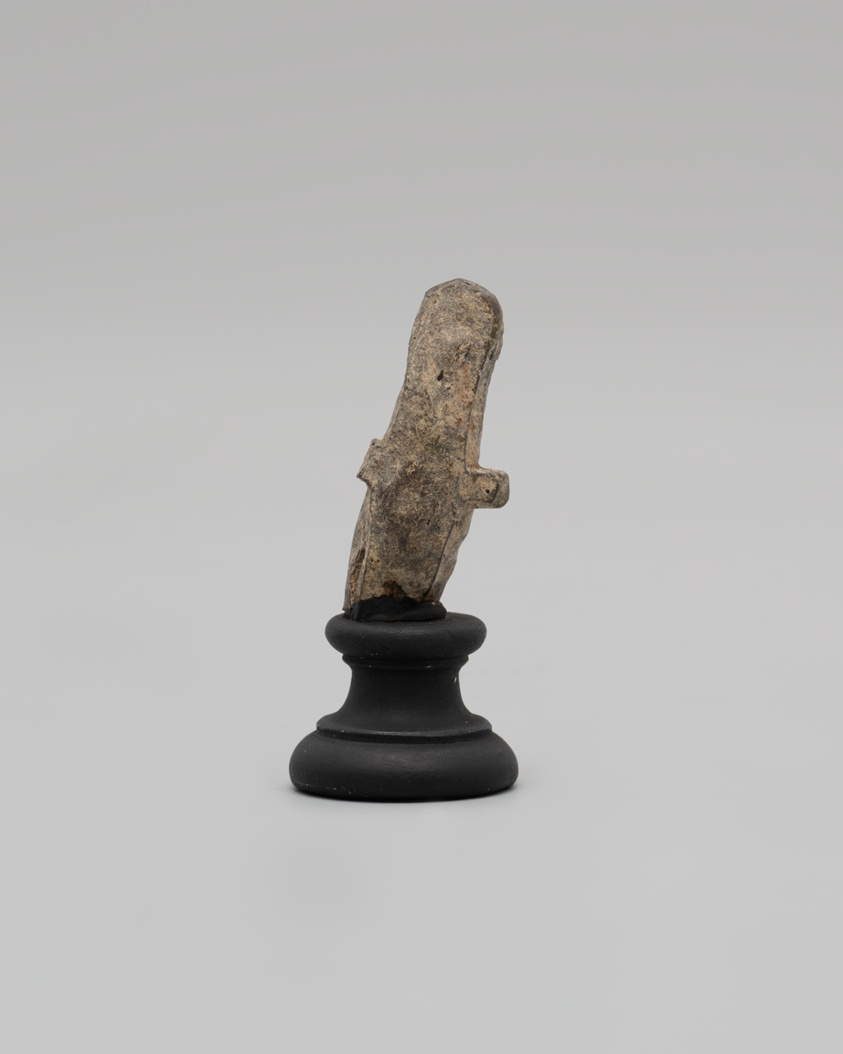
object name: Sculpture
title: Fragment of a Herm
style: greek, ancient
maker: Greek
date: 3rd-2nd century BCE ?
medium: terracotta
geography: Greece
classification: earthenware; ceramics; sculpture; ancient art